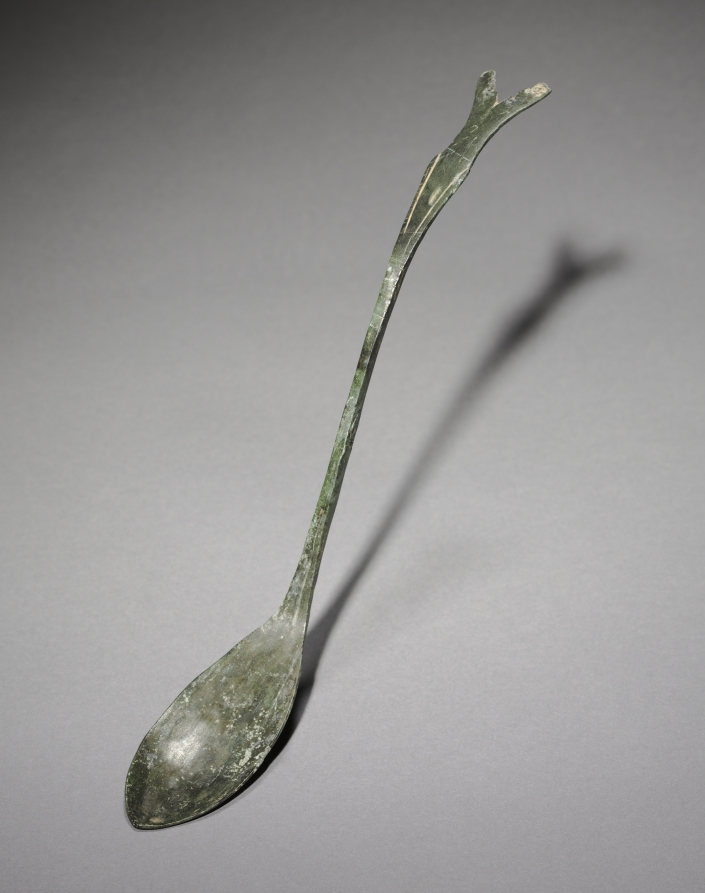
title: Spoon with Fish-Tail Design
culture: Korea, Goryeo dynasty (918–1392)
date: 918–1392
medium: bronze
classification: Metalwork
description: Many of Goryeo period spoons like this one feature a curved handle that splits into a jagged fishtail design. This fishtail design is not unique to Korea; it was also widely used in the area under the rule of two non-Han Chinese states: Liao (907–1125) and Jin (1115–1234). These seemingly ordinary objects testify to exciting material interactions between the Goryeo dynasty and non-Han Chinese northern states, which were often omitted from the official records.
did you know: Bronze spoons are the most common burial item. Scholars have proposed that toward the end of the 14th century, Koreans enjoyed meat-based soups more than any other dishes, explaining why spoons became common household items as well as burial goods.